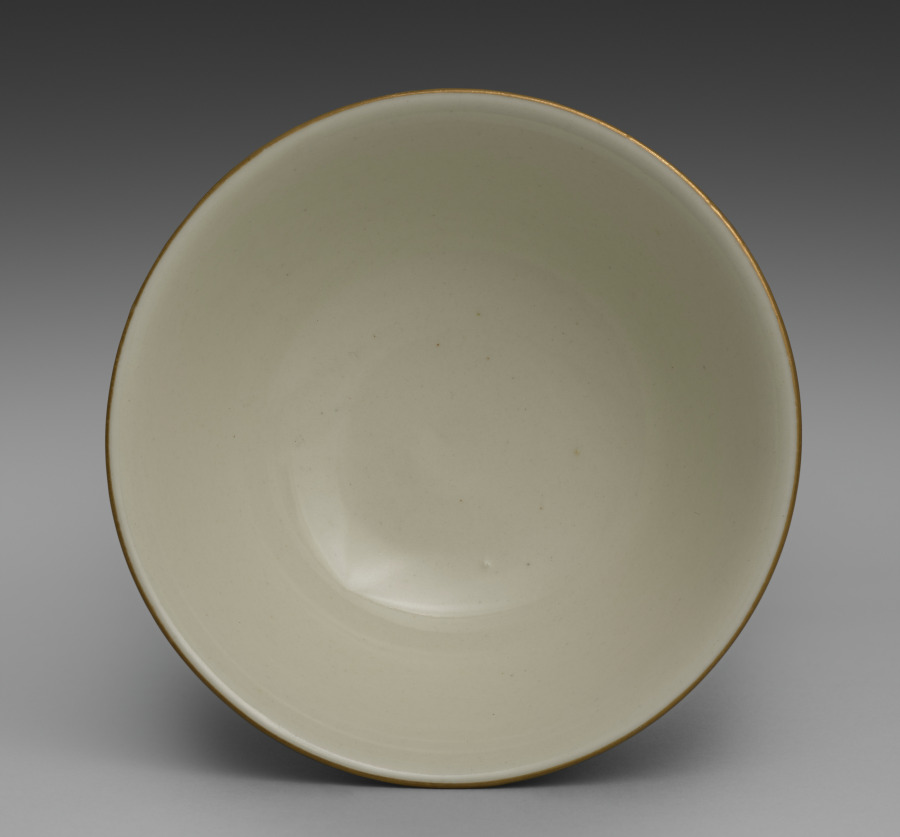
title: Bowl from Dining Set with Plum Blossoms and Cracked-Ice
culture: Japan, Meiji period (1868–1912)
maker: Seifū Yohei II (Japanese, 1844–1878)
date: c. 1875–78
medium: Porcelain with molded designs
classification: Ceramic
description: Each item in this set has a delicate low-relief design of flowering plum branches over scattered, intersecting lines meant to resemble the cracked-ice surface of a frozen body of water and is signed on the base in gold pigment. While Yohei II produced many fine works in underglaze blue, like those produced by Kiyomizu Shichibei, he also made works in quite different styles later in his career, from the early 1870 s. In 1873, he was appointed purveyor to the Industrial Center of Kyoto Prefecture, a designation associated with Kyoto’s efforts to reach an international market through the port of Kobe; and from 1875 until his death, he was involved in national-level projects to present Japanese ceramics across the world. It was during this period that Yohei III was apprenticed to Yohei II, and it has been suggested that this set may in fact be an early example of Yohei III’s work, which he signed with his teacher’s name. Decorated with flowers resembling Japanese textile motifs, the set calls to mind the design of Yohei II’s pair of vases with plum blossoms in the Victoria and Albert Museum. Here, the elaborate trees created for a formal public exhibition setting have been translated into the approachable blossoms of the genteel domestic environment. While the designs are consistent across the pieces, each raised flower petal and pistil and each incised line in the ice was done by hand, so the cups, bowls, and dishes are similar yet unique. The bottoms of two boxes once identified the set’s owner, but the information has been deliberately obscured with black ink. However, inscriptions still visible appear to indicate two occasions, once at the end of July 1886 , and once again in June 1916 , when parts of the set were requested from Hokura in Niigata Prefecture. The location corresponds to a neighborhood in the present-day city of Jōetsu. The surname Tsuji 辻 also appears on a paper tag affixed to one of the box cloths. Future research may possibly reveal more about their provenance. A vase by Yohei III in a private collection combines the formal grandeur of the Yohei II vases in the Victoria and Albert Museum with the gentler design of this dining set, placing flowering plum trees against soft, scalloped-edge clouds resembling those in golden screens.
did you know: The dining wares have a creamy white coloration that the four boxes containing them identify as Korean in style.